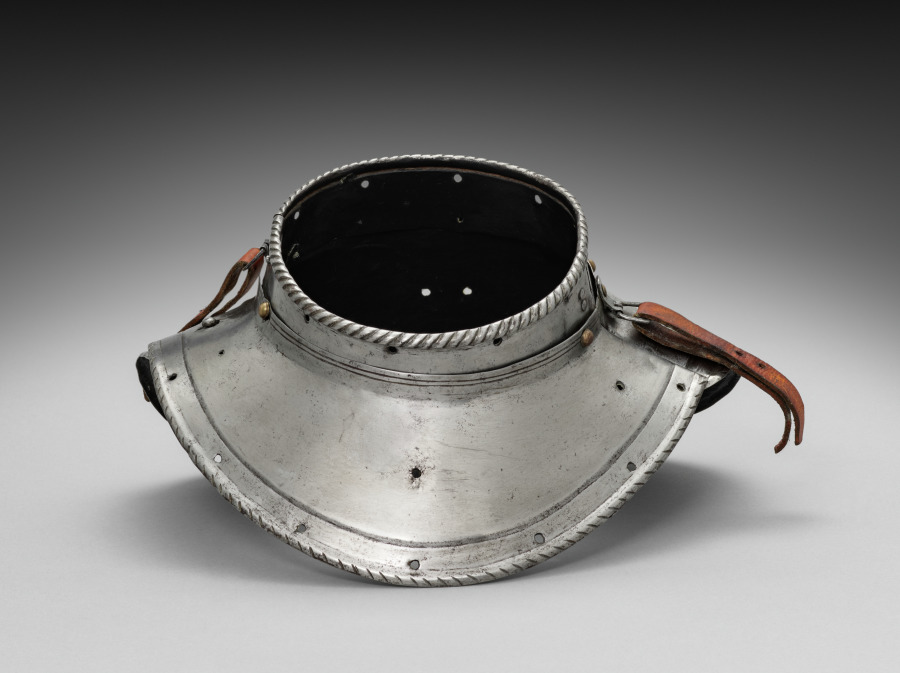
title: Colletin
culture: Germany, 19th century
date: 1801–1900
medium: steel with black paint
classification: Arms and Armor